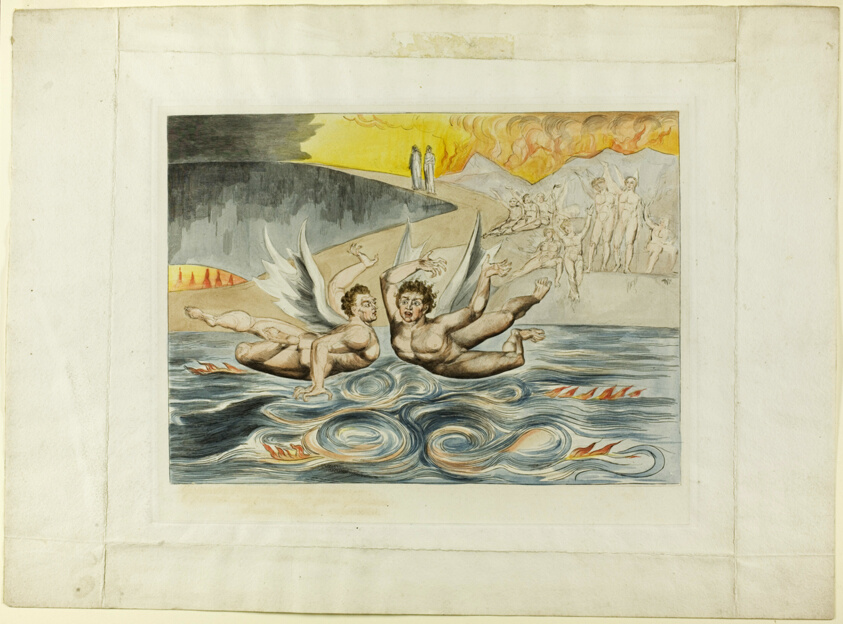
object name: Print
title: The Circle of the Corrupt Officials; the Devils Mauling Each Other. Inferno, canto XXII.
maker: William Blake (English, 1757-1827)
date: 1827, printed c. 1892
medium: Hand-colored engraving on India paper, laid down on wove paper (chine collé)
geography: England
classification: engraving; paper; print; prints and drawing